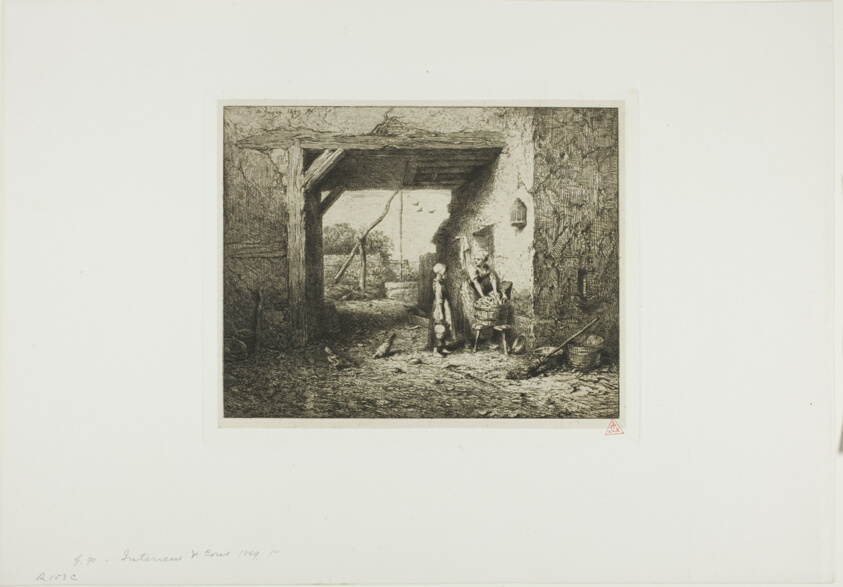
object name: Print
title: Courtyard Interior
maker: Charles Émile Jacque (French, 1813-1894)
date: 1849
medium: Etching on cream China paper laid down on ivory wove paper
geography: France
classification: etching; print; prints and drawing